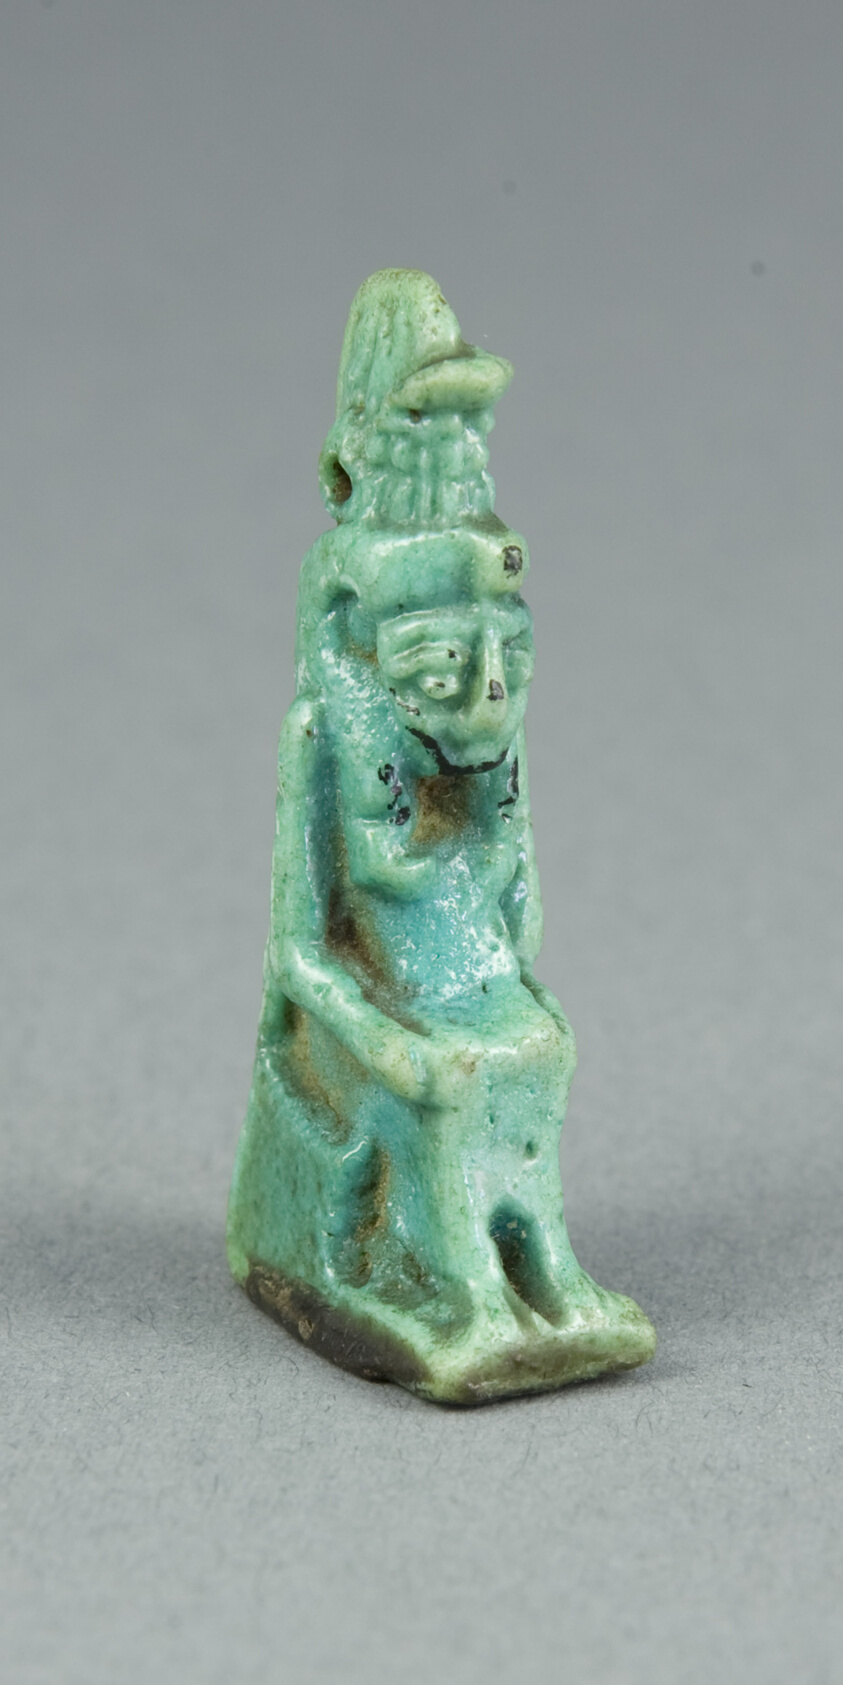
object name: Costume and Accessories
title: Amulet of the Goddess Mut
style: egyptian, ancient, late period (egyptian), ptolemaic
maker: Egyptian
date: Late Period–Ptolemaic? (about 7th–1st century BCE)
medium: Faience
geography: Egypt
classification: amulet; jewelry; ceramics; ancient art; costume; faïence (composite material)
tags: goddesses